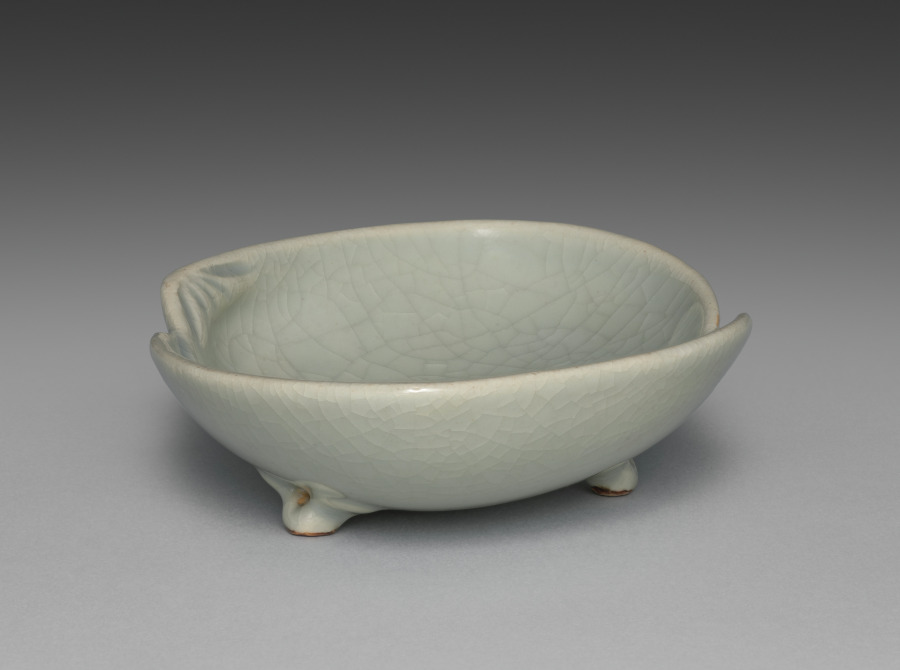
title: Dish from Dishes with Matching Shells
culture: Japan, Meiji period (1868–1912)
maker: Seifū Yohei III (Japanese, 1851–1914)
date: 1893–1914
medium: One of a pair of dishes; porcelain with celadon glaze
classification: Ceramic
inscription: 清風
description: Yohei III’s main output for his sophisticated clientele was in the form of tea sets and dining sets. He created a range of dishes in green glazes. He often produced in pairs, sets of five, or sets of ten. This pair of shell dishes have a box lid interior attestation by Yohei IV that the dishes were made by Yohei III with a cracked-ice (hyōretsu) pattern in the glaze, omitting reference to any glaze coloration.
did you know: These shell-shaped dishes are of the saucer type, suitable for dipping sauces.